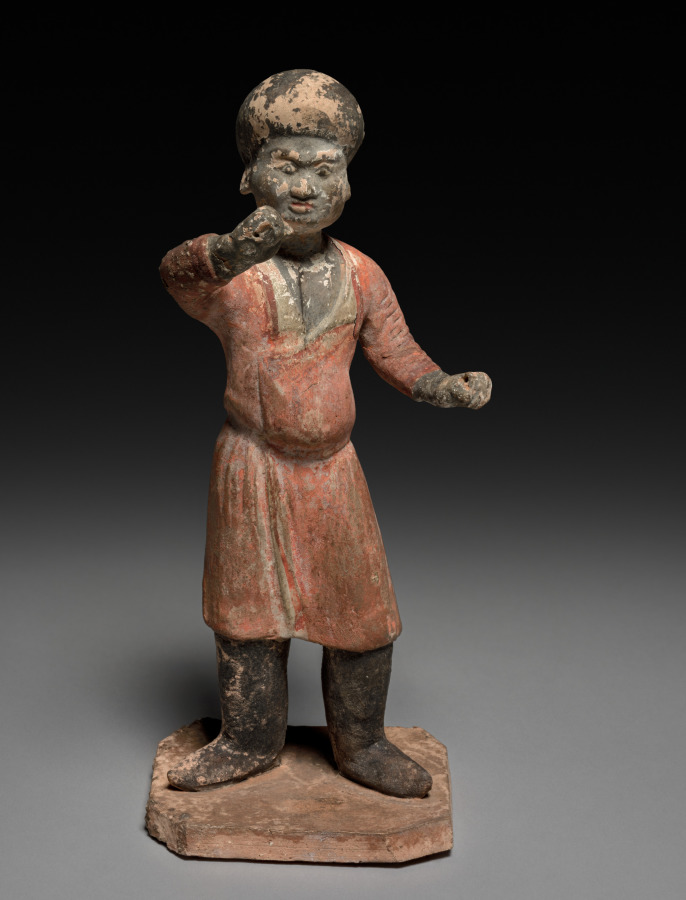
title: Groom (Tomb Figure)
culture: China, Sui dynasty (581-618) - Tang dynasty (618-907)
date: late 500s–early 600s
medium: buff earthenware with polychromy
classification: Sculpture